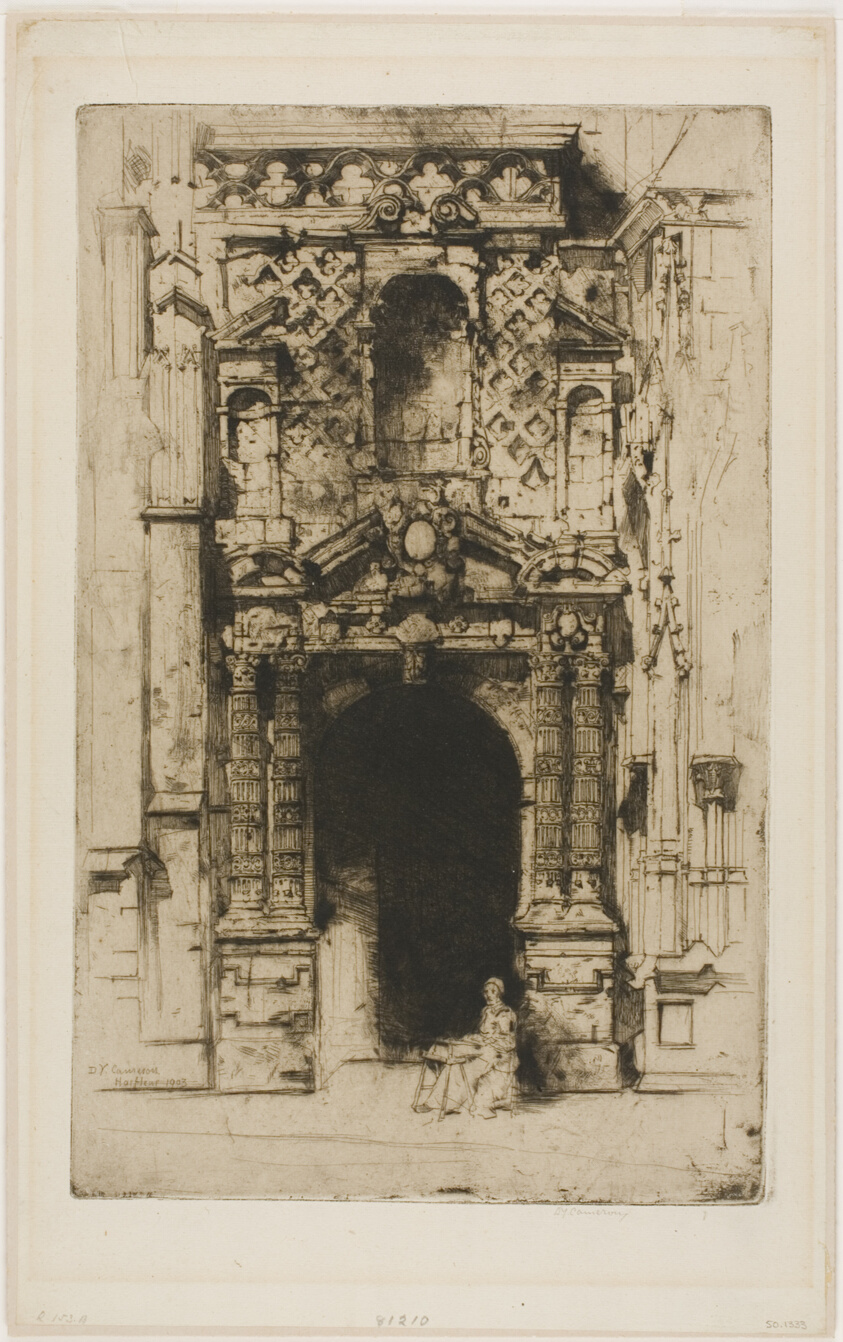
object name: Print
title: Harfleur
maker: David Young Cameron (Scottish, 1865-1945)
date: 1903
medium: Etching on buff laid paper, laid down on buff board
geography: Scotland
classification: etching; print; prints and drawing